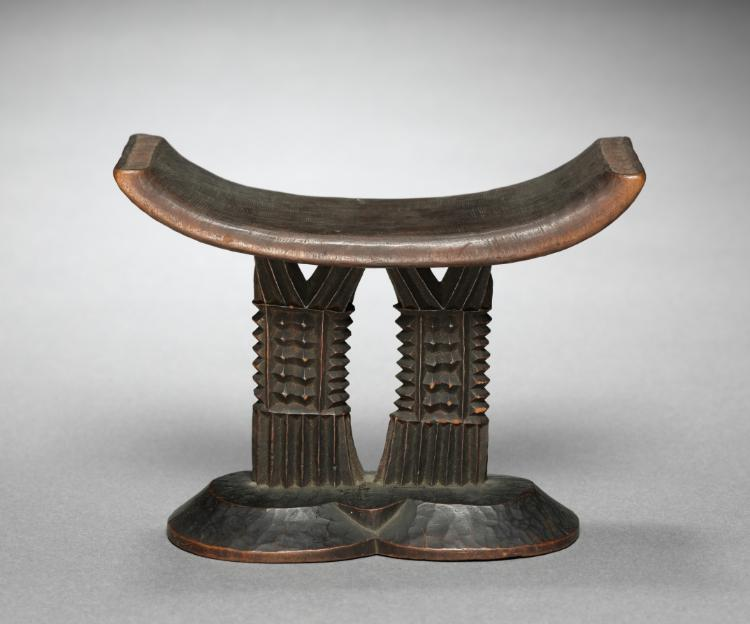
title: Headrest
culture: Southern Africa, Zimbabwe or Mozambique, Shona-style blacksmith-carver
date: c. 1910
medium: wood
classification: Furniture and woodwork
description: Headrests allowed Shona men to protect their elaborate braids. Placed under the neck or chin, frequent contact with hair and hairdressing products darkened its top. Tool marks show how it was smoothed only where the skin would make contact. Linked intimately to their owner, headrests often became burial goods or heirlooms. Recent research suggests Shona headrests symbolized women; small projections on the supports likely reference scarification marks worn by women of marrying age. As only mature men used headrests, it reinforces their female symbolism and women’s societal importance as wives.